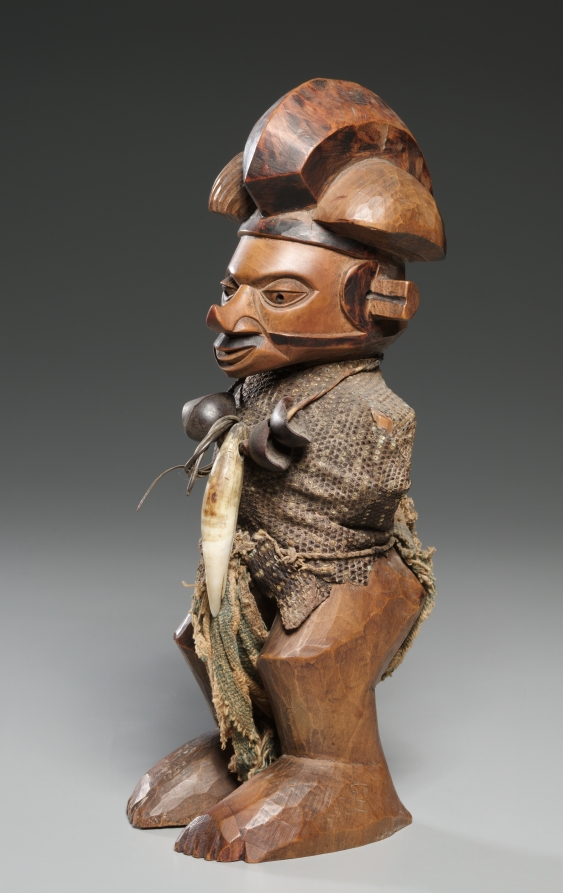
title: Figure (kiteki)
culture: Africa, Central Africa, Democratic Republic of Congo, Yaka-style carver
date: late 1800s–mid-1900s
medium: Wood, lizard skin, leopard tooth, pods, cloth, and natural fiber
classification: Sculpture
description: Biteki is the generic name for Yaka figures used as containers for magical ingredients. After being charged by a ritual specialist, they become minkisi, or power objects, and gain the power to either cure or harm. This example, with various leadership accouterments, likely belongs to the category called phuungu. Placed inside a house, the statuette would have protected against witches and other evil.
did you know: The sculptures and the specially selected materials inside assist the prayers of owners for protection from harm, sickness, or loss.